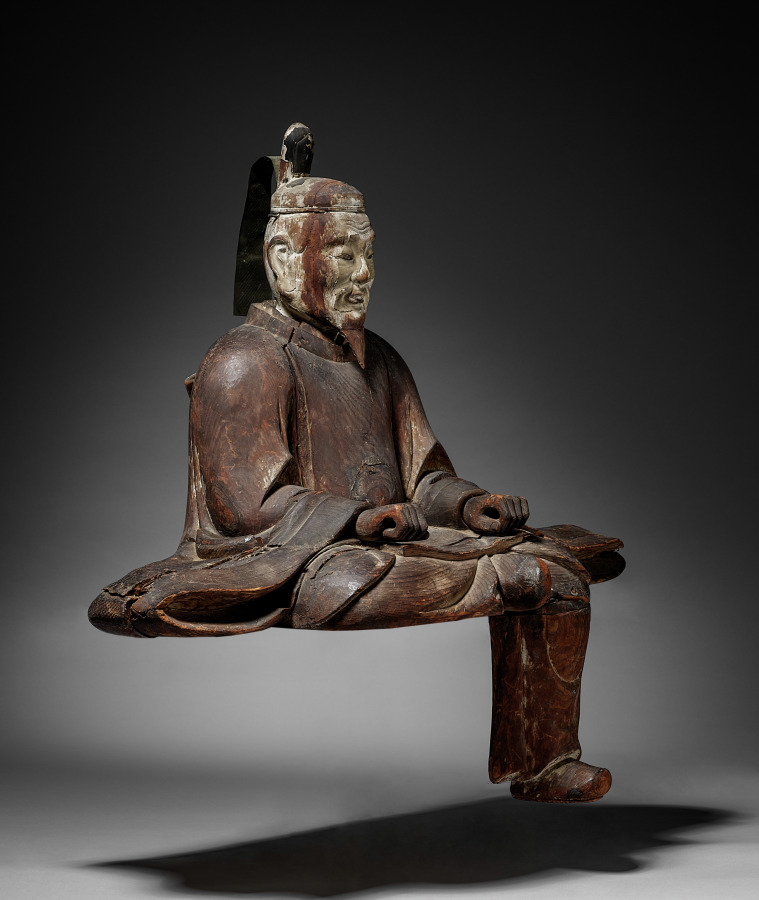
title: One of a Pair of Guardian Figures (Zuishin)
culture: Japan, Muromachi period (1392–1573) to Edo period (1615–1858)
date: c. 1560–1625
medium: Japanese cypress (hinoki) with traces of color; crystal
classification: Sculpture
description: Sculptors carved these two figures to look like members of the guard who protected the Japanese aristocracy in the 10th to 12th centuries. The pair belong in the roofed gate of a Shinto shrine. Their role was to embody the divine protectors of the deities, or kami, residing at the shrine. Their inset crystal eyes make them appear vigilant.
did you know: Some Japanese sculptors used to specialize in inset crystal eyes.